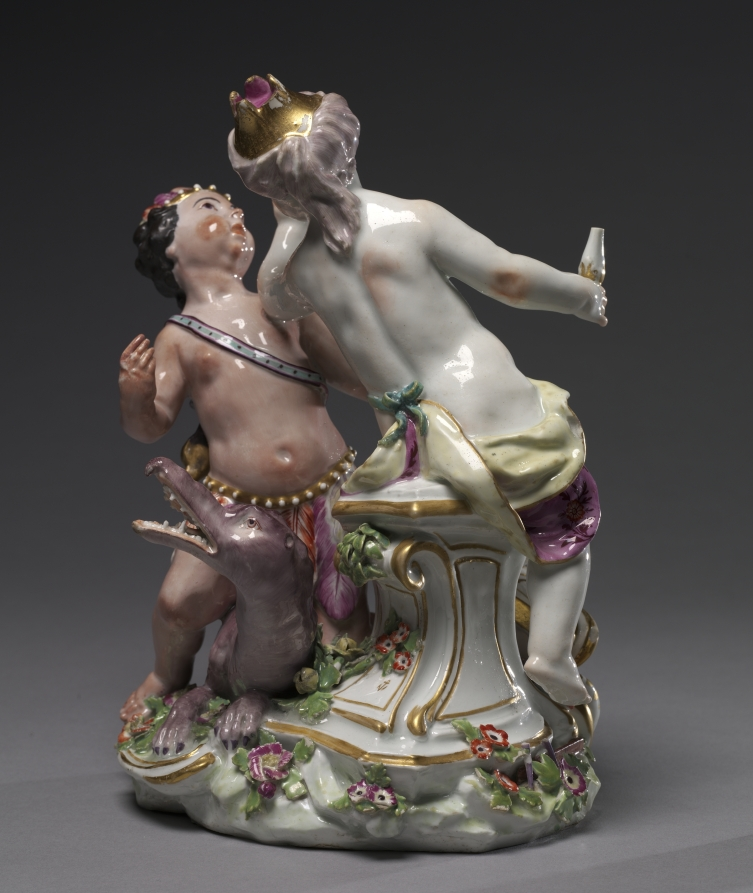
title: Figure of Europe and America from the Four Continents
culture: England, Chelsea, mid-18th century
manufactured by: Chelsea Porcelain Factory (Britain, London, 1745–84)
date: c. 1760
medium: soft-paste porcelain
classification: Ceramic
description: Often collected by wealthy British merchants who were beneficiaries of colonial expansion, figural groups were frequently part of elaborate table decorations meant to signify wealth and global dominance. Here, Europe is seen holding an orb and wearing a crown as queen of the world, suggesting Europe’s supremacy over the other continents. She is entangled with America, who is wearing feathers with a bow and arrow at her feet. This depiction of America reveals a purely imagined understanding of faraway places.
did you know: Figural representations of the four continents date back to the 1500s, but such imagery became even more popular in the 1700s as European empires expanded.